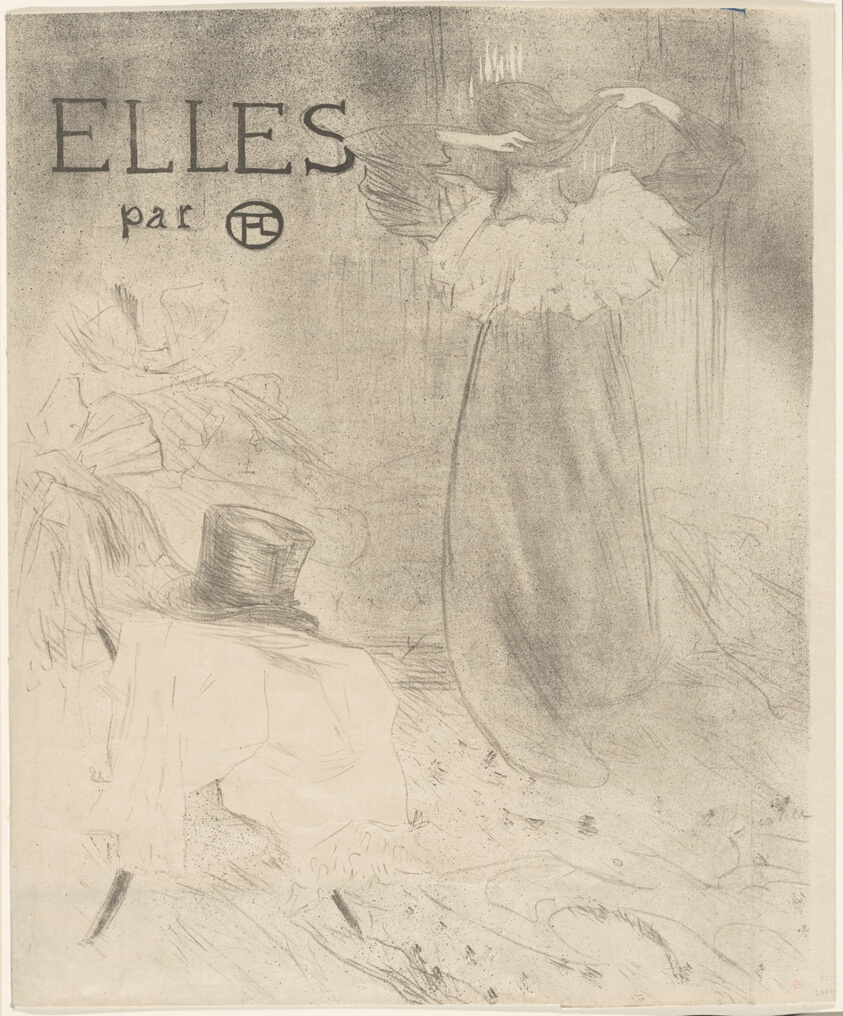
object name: Print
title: Cover for Elles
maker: Henri de Toulouse-Lautrec (French, 1864-1901); published by Gustave Pellet (French, 1859-1919); probably printed by Auguste Clot (French, 1858-1936)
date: 1896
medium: Color lithograph on cream wove paper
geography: France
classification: lithograph; print; prints and drawing